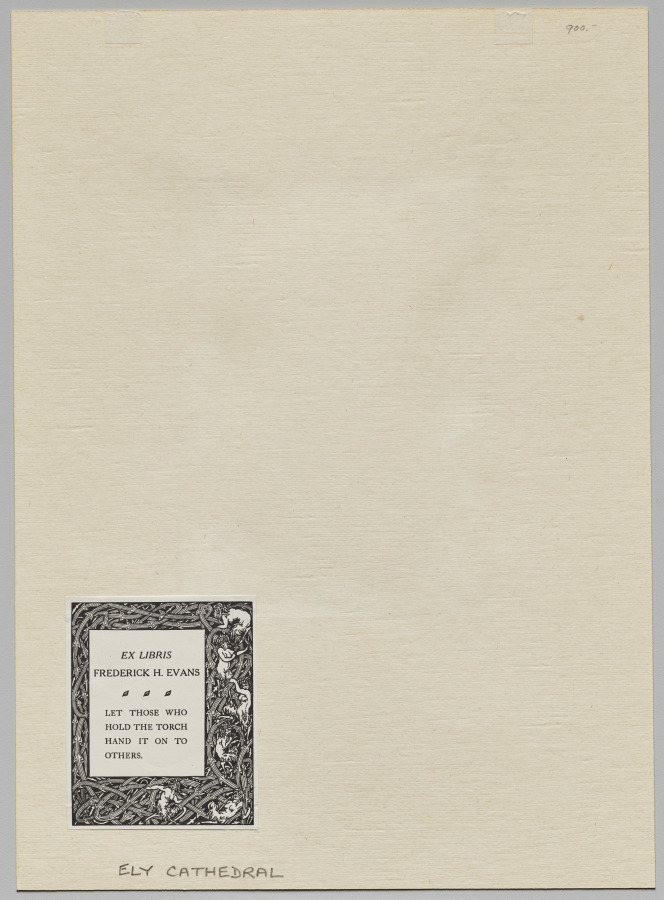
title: Bishop Alcock's Chapel from Reho-Choir, Ely Cathedral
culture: England, 19th century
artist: Frederick H. Evans (British, 1853–1943)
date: 1897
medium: platinum print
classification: Photograph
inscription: Written in pencil on recto of primary mount: “Bishop Alcock’s Chapel”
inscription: Embossed in lower right on recto of primary mount: “FHE”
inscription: Ex-Libris plate adhered to verso of tertiary mount: “Ex Libris/Frederick H. Evans/Let those who/hold the torch/hand it on to/others”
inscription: Written in pencil on verso: “ELY CATHEDRAL”